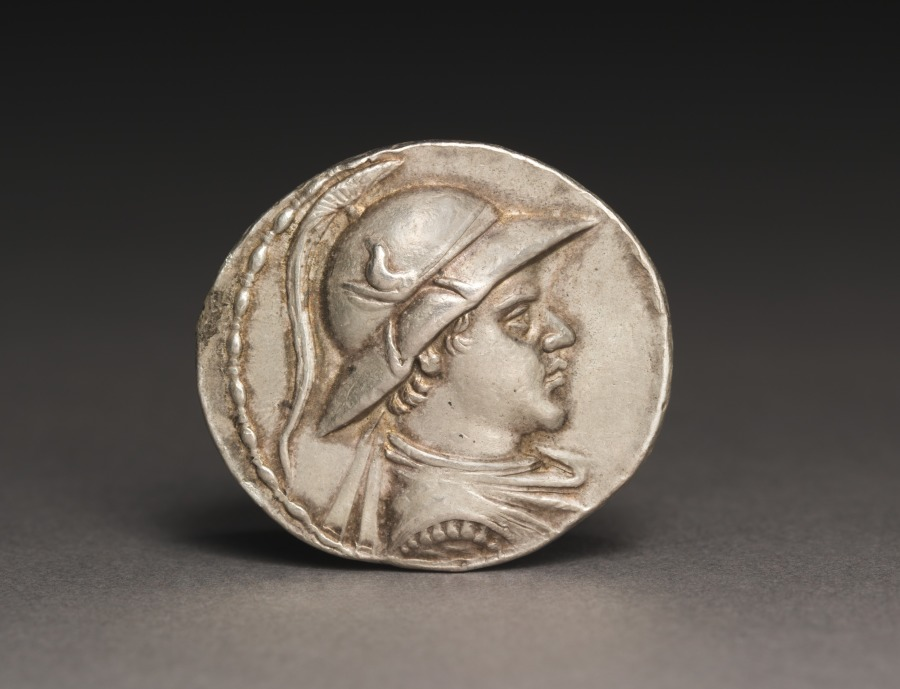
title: Coin of Eukratides I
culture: Afghanistan, Bactria, Eucratides I (171–145 BCE)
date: 170–145 BCE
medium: silver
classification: Coins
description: After Alexander of Macedon succeeded in conquering Egypt and Persia in 331 BC, his ambition to rule the known world led him further east across Bactria in Afghanistan, through the Hindu Kush mountain pass, and into India. There he succeeded in defeating all the local kings of the region until his men, on the brink of mutiny, insisted that they return to Greece. Alexander left governors in charge of his territories, and after his death in 323 BC, his governors became independent kings, establishing Hellenistic cities and a Greek cultural base in the region, which lasted for almost 200 years. The king of Greek descent who ruled over territories in Afghanistan and Pakistan depicted himself with the brimmed military helmet with the bull's ear and horn of Poseidon, worn by generals from Macedon, the northern Greek country from which Alexander came. After his death, Alexander's vast empire that stretched from Macedon across Egypt and Persia all the way to the Indus River was divided among military leaders in his army. On the reverse side of this coin are the twins Castor and Pollux riding horseback with long spears. These twins were sons of Zeus. Since Alexander considered himself to be an offspring of Zeus, Eukratides referenced his link to Alexander by including them on his coin.